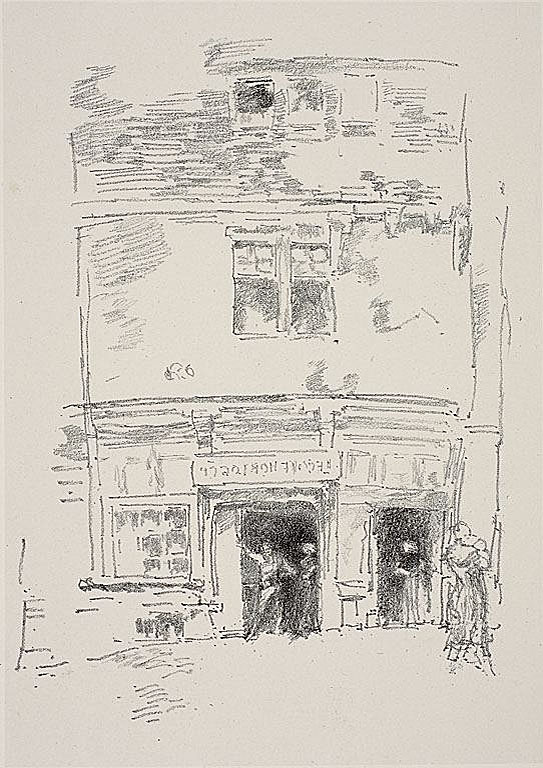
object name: Print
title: The Clock-Makers, Paimpol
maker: James McNeill Whistler (American, 1834-1903)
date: 1893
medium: Transfer lithograph in black on ivory chine, laid down on ivory plate paper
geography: United States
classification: transfer lithograph; lithograph; print; prints and drawing; paper